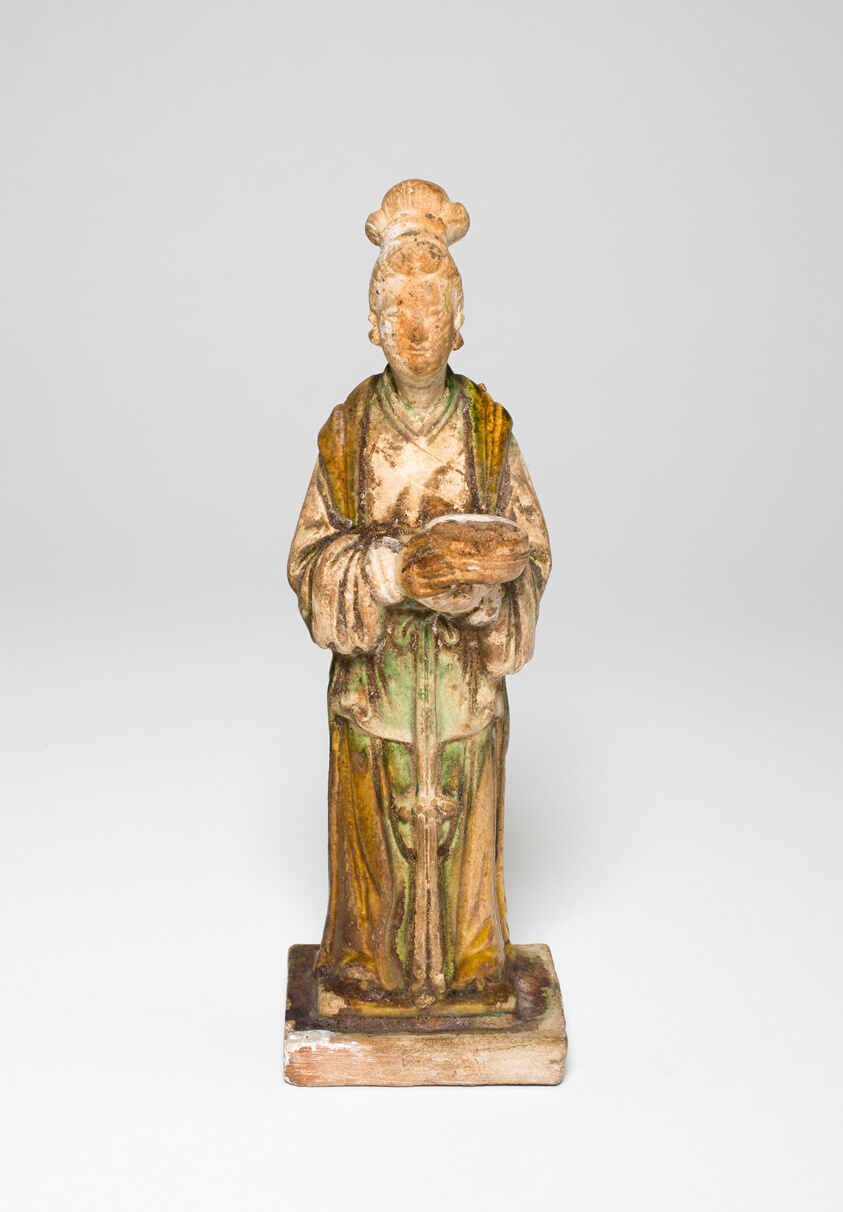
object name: Sculpture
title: Female Figure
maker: China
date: Ming dynasty (1368– 1644)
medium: Glazed earthenware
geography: China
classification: earthenware; asian art; ceramics